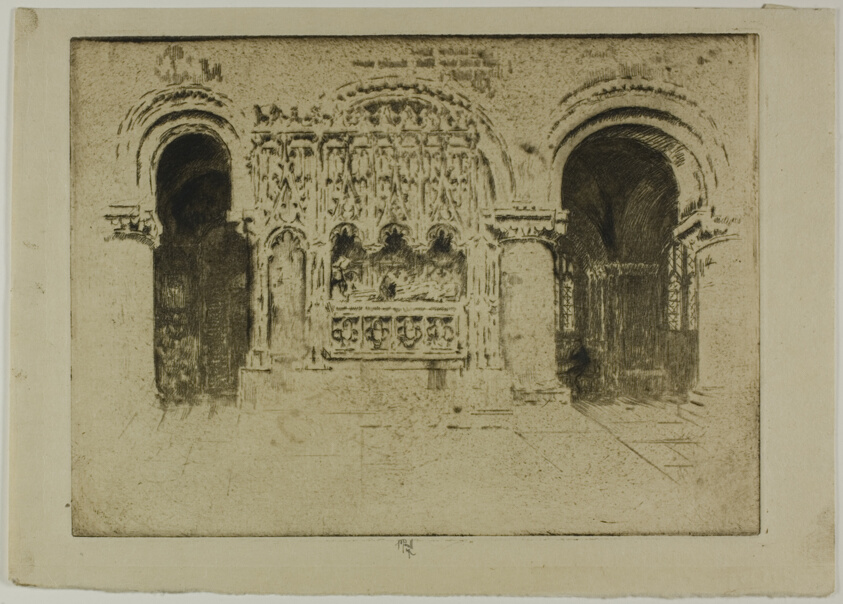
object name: Print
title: The Founder's Tomb, Church of Saint Bartholomew the Great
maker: Joseph Pennell (American, 1857-1926)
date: 1903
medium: Etching on paper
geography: United States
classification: etching; print; prints and drawing